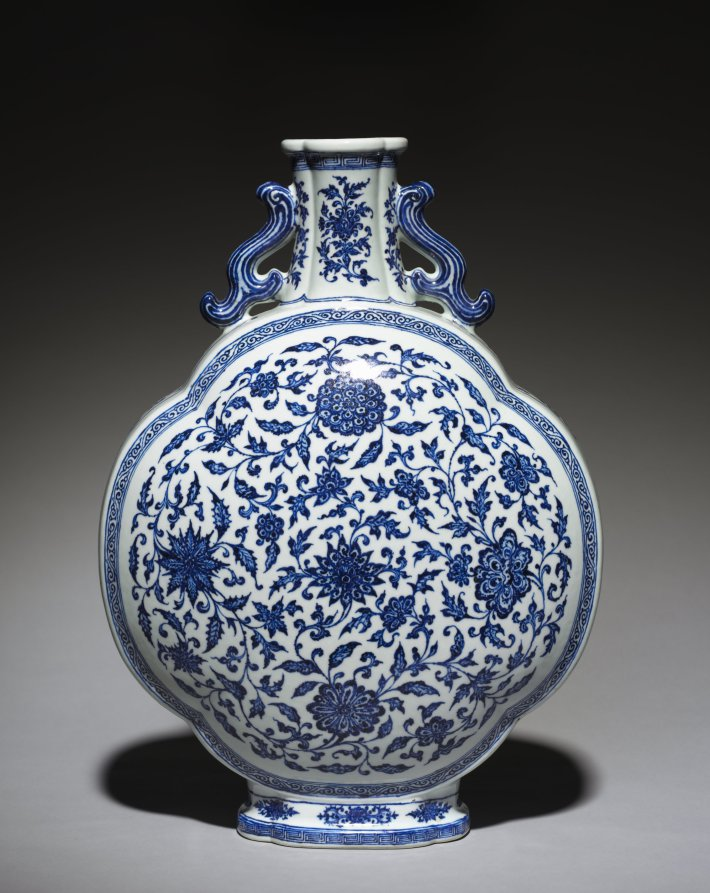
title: Gourd Flask with Floral Scrolls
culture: China, Jiangxi Province, Jingdezhen, Qing dynasty (1644–1911), Yongzheng mark and period (1723–35)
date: 1723–35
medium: porcelain with underglaze blue decoration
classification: Ceramic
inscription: Yongzheng mark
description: This large blue-and-white pilgrim–shaped vase was fashioned from fine kaolinic porcelain at the imperial kilns at Jingdezhen, Jiangxi province. The body of the vase is of quatrefoil shape merging into a highly similar shaped neck, flanked by two scroll handles. The base is of oval quatrefoil form. The vase is decorated with lotus and other flowers, leaves, and scrolling tendrils in brilliant underglaze cobalt blue beneath a pellucid glaze. The underfoot bears an imperial mark.